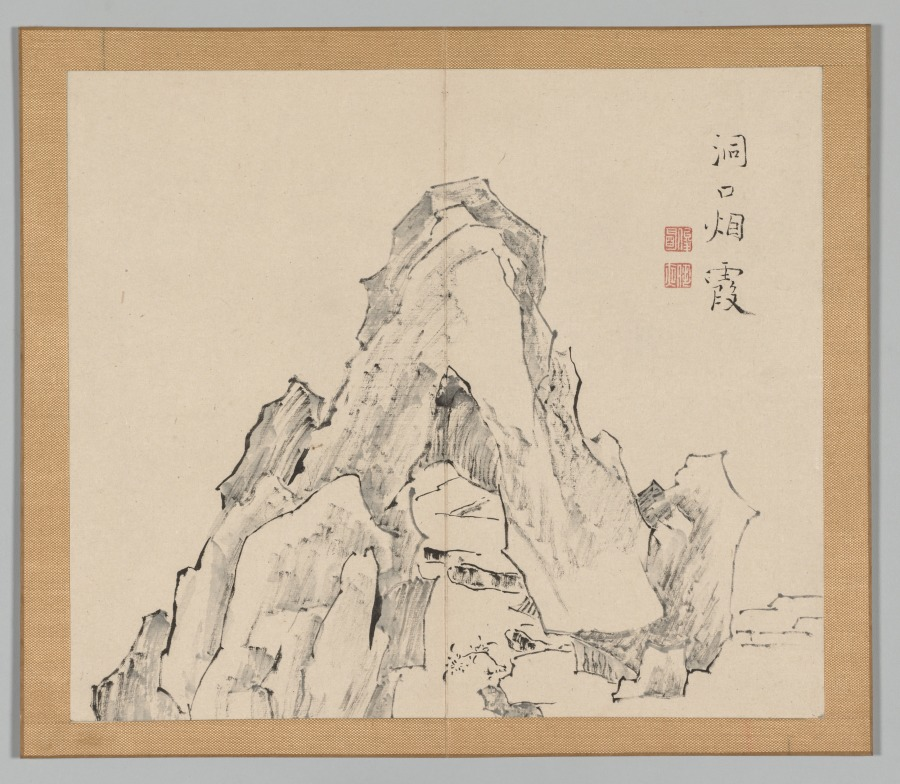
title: Reverberations of Taiga, Volume 2 (leaf 20)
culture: Japan, Edo period (1615–1868)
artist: Aoki Shukuya (Japanese, d. 1802)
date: mid- to late 1700s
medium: double-leaf from a pair of albums; ink and light color on paper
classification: Portfolio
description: Traditionally, young painters in Japan began their studies with an established master-painter. The master's compositions invariably became models that the apprentice copied to learn various ink and brush techniques. Shukuya was a pupil of the famous Kyoto artist Ikeno Taiga, whose style is reflected in these sketches of rocks, trees, and mountains.